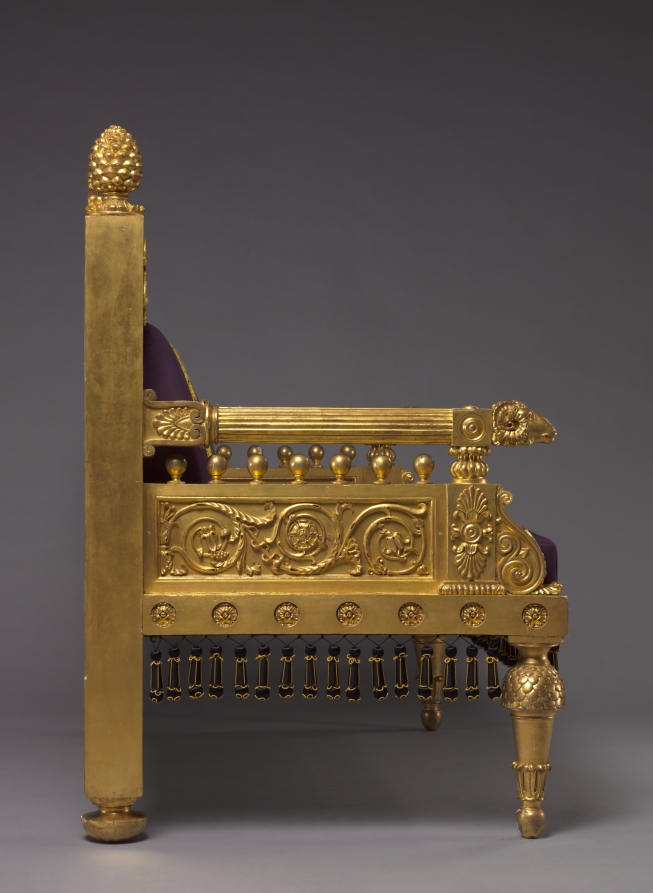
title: Settee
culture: England, 19th century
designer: Thomas Hope (British, 1769–1831)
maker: Unknown Maker (British)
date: c. 1802–07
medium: gilt-wood, reproduction wool upholstery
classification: Wood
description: An art collector, designer, and champion of neoclassicism, Thomas Hope designed this settee for display in his London house. Hope’s design exemplifies the continued interest in neoclassical ornament around 1800 through the use of elaborately carved friezes, a central pediment, and a lavishly gilded surface. In 1807 Hope published Household Furniture and Interior Decoration, featuring descriptions of his renowned collection of antiquities and the interior furnishings from his London house, including this settee. Many architects and cabinetmaking firms took inspiration from Hope’s designs, adapting Greek and Roman forms to create bold expressions of neoclassicism in their architecture and decoration.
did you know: The acorn finials, ram’s heads, and clusters of stylized honeysuckle flowers along the settee’s frame are typical of Thomas Hope’s neoclassical designs.